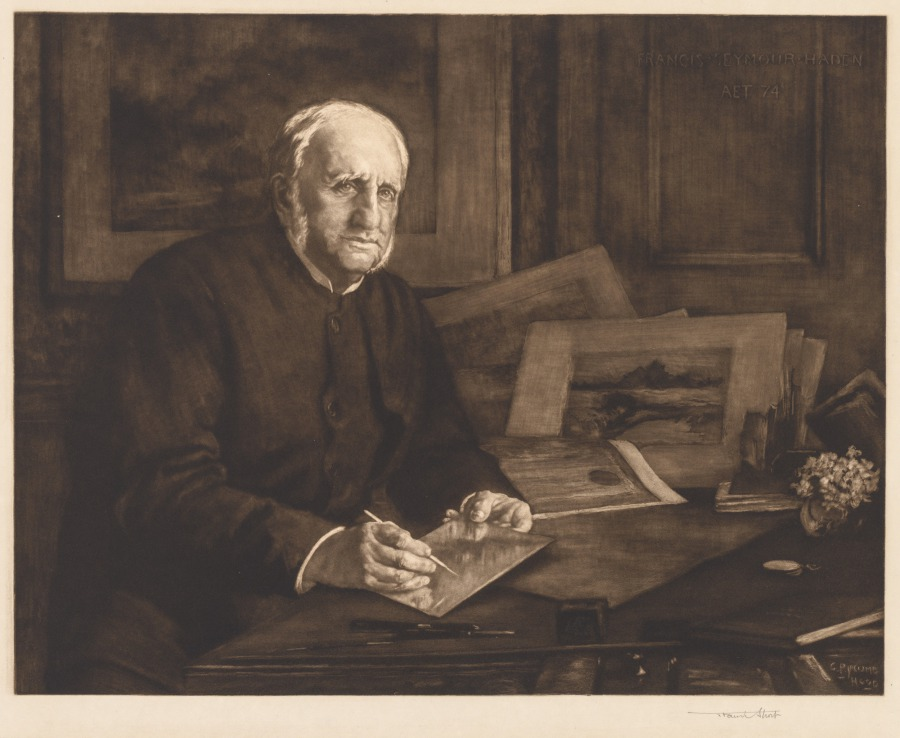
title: Sir Francis Seymour Haden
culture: Britain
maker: after George Percy Jacomb-Hood (British, 1857–1929)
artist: Francis Seymour Haden (British, 1818–1910)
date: 1901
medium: mezzotint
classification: Print